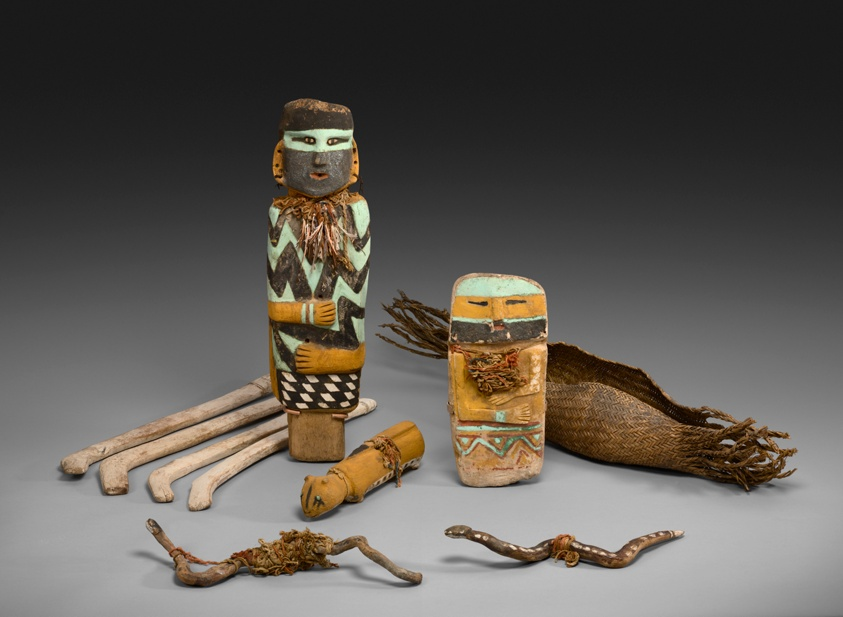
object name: Religious/Ritual Object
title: Ritual Cache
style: salado, mimbres, mogollon, americas, southwest, native american, native north american, Arts of the Americas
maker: Salado branch of the Mogollon; New Mexico, United States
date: 1300–1400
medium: Wood, stone, plant fibers, cotton, feathers, hide, and pigment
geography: New Mexico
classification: ceremonial object; ceramics; masks; ritual objects; art of the americas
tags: ceremonial objects, figures (representations), snakes, ritual objects, mountain lions, indigenous, nature, altar, offering, feathers, corn, lightning, fertility, supernatural, basketry, hunting